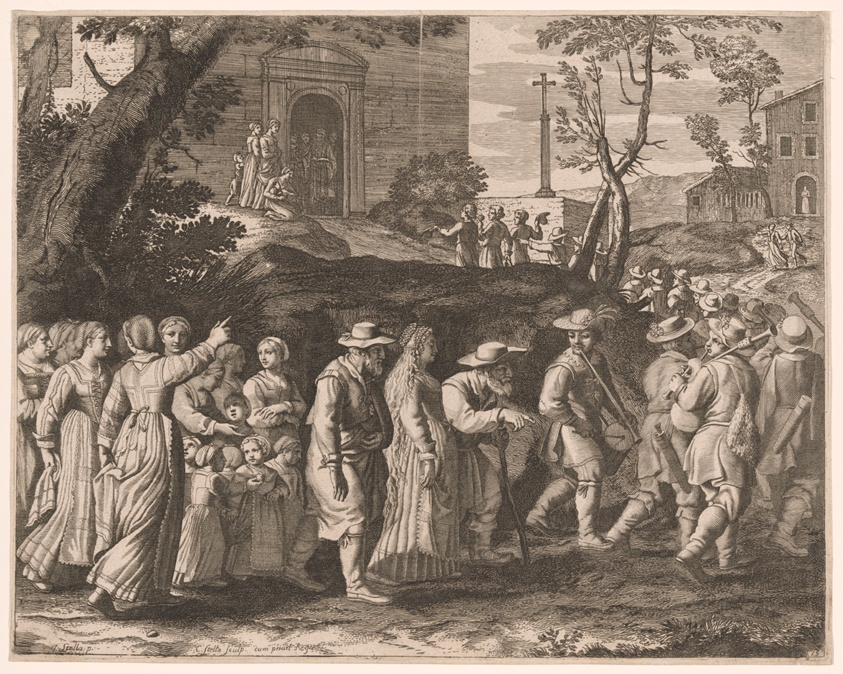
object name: Print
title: The Wedding Procession, Plate 15 from Pastorales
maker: Claudine Bouzonnet-Stella (French, 1636–1697); after Jacques Stella (French, 1596-1657)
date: 1667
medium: Etching in black on cream laid paper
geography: France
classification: prints and drawing; paper; etching; print